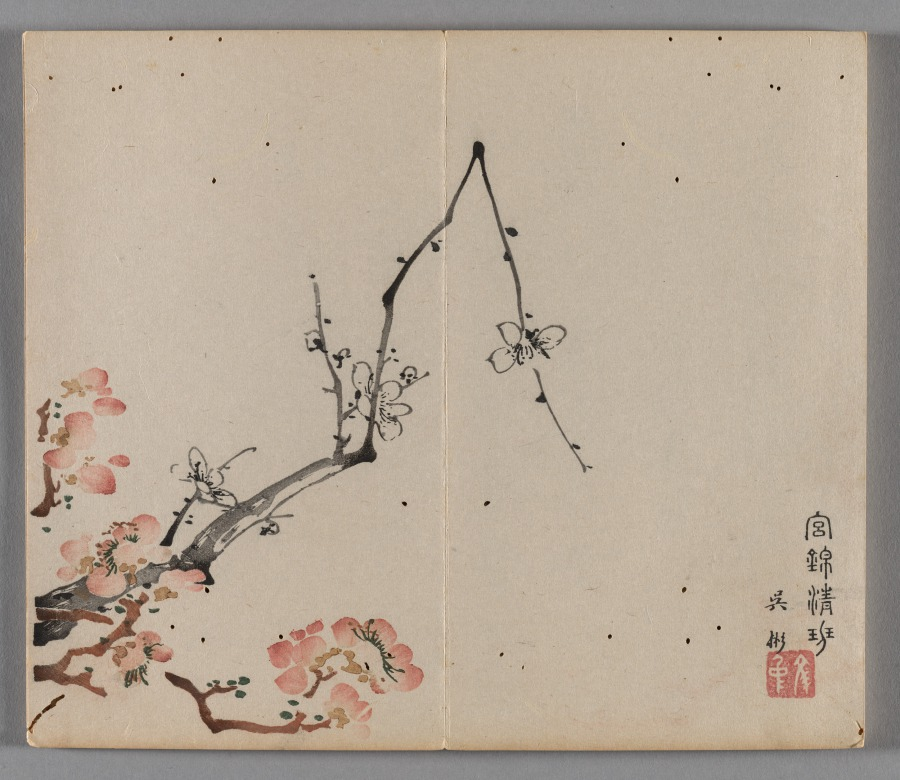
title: Ten Bamboo Studio Painting and Calligraphy Handbook (Shizhuzhai shuhua pu): Plum Blossoms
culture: China, Qing dynasty (1644-1911)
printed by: Hu Zhengyan (Chinese, c. 1584–1674)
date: 1633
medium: Woodblock-printed book; ink and colors on paper; first edition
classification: Print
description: Color printing reached a level of perfection in the early 1600s, as seen in this Ten Bamboo Studio Collection of Calligraphy and Painting and the Mustard Seed Garden Manual of Painting (printed 1679 and 1701). The painterly quality, precision in registering (aligning) the woodblocks, and harmonious colors made them the most successful color print editions in Chinese history. Both editions were printed and compiled in Nanjing, spread nationwide, and had a great impact on the arts in Japan and Korea.